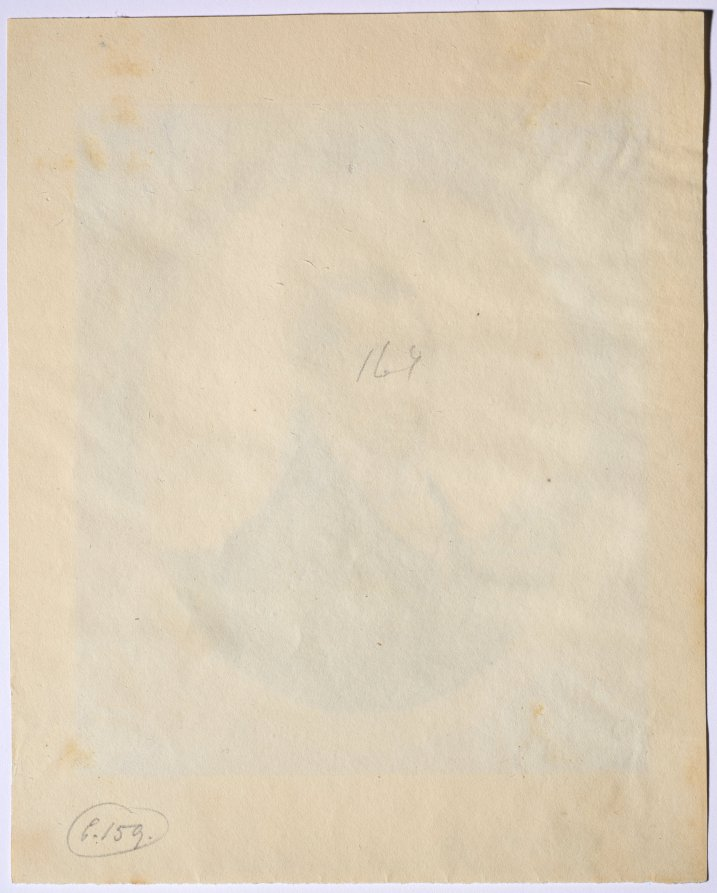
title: Portrait of General Keith MacAlister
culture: England, 18th century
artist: John I Smart (British, 1741–1811)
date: c. 1800–1810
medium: watercolor and graphite, heightened with traces of white gouache, on paper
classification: Portrait Miniature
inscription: across bottom, in graphite: Genl Macalester ; VERSO, center, in graphite: 169; lower left, in graphite: l. 159. [circled]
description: Although it is impossible to say if it was always part of the artist’s process to execute a preparatory sketch prior to painting each miniature, we do know that John Smart retained many hundreds of these sketches. A great number were inherited by his son John James Smart, who in turn left them to his daughter Mary Ann Bose. Upon her death in 1934, they were divided between three of her children: William Henry Bose, Lilian Dyer, and Mabel Annie Busteed. General MacAlister is represented in three-quarter view, bust length, and facing the right. His eyes are blue, but the right eye is clouded and lighter in color than the left. There is no sign of isolated damage or fading, confirming that this color difference was among MacAlister’s physical attributes. He wears a brown coat; white, frilled vest edged in black; tall collar; and a white cravat tied in a bow. His closely cropped hair is powdered, and an unidentified rocky landscape through which a small river runs is painted in the background; it probably represents a place of personal significance in Scotland or India, possibly even Seringapatam and the Cauvery River. Smart depicted MacAlister inside of a penciled oval tromp l’oeil frame. The drawing is replete with physically informative details and is larger and more finished than drawings intended to function exclusively as preparatory sketches, though it may also have served this purpose. Beneath the elaborate penciled border is written in large graphite script “Genl Macalester.” This inscription is not in the artist’s hand and almost certainly a later addition. A Colnaghi label was removed from the verso after the work entered the museum’s collection. The sitter is likely Major-General Keith MacAlister (1746–1820) of the Madras Cavalry. He was the eldest of three soldier brothers who served with distinction in India. MacAlister was born at Skerrinish in the Isle of Skye and ascended through the ranks rapidly following his appointment as cadet in 1777. He became captain in 1796; lieutenant-colonel in 1799; colonel in 1809; and major-general in 1812. He is celebrated particularly for his role in the 1799 storming and capture of Seringapatam, a decisive battleground in the Fourth Anglo-Mysore War, and for rescuing his brother Matthew from a long imprisonment in the same city. MacAlister was also instrumental in organizing the Madras Light Cavalry.5 Smart’s portrait of MacAlister would have been painted between 1800 and 1810, when the sitter was an older man and had returned to England before settling in Scotland. The Nelson-Atkins Museum of Art owns a Smart portrait on ivory called Keith Michael Alexander, dated 1810. Although he wears a military uniform rather than civilian clothes, the sitter is identical to the one in the Cleveland drawing—note in particular the differently colored eyes and the blue veins at the left temple. Although it was painted in 1810, possibly some years after the Cleveland sketch, the sitter’s hair loss is more pronounced in the earlier drawing. This inconsistency can be explained by the fact that Regency fashion called for men to comb their hair forward, thereby obscuring baldness, as seen here. Otherwise, the portraits are so similar that it is likely that Smart was consulting the earlier finished drawing when executing the 1810 miniature in ivory. Both “General Macalister” and “Colonel Keith Michael Alexander” are listed by Daphne Foskett among Smart’s sitters, but she reproduces images only of the latter Nelson-Atkins miniature. No additional portraits of the period depicting gentlemen of either name have been discovered at this time. The Nelson-Atkins ivory has been called Keith Michael Alexander by tradition at least since it was in the Mr. and Mrs. John W. Starr collection before entering the museum in 1958. However, the miniature has not been removed from the frame since its acquisition, and there is no evidence of an inscription. It is likely that Keith Michael Alexander is a mistaken interpretation of the name Keith MacAlister, particularly because no record of a soldier by the name of Keith Michael Alexander has been discovered.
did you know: Sketches helped John Smart work out the particulars of a portrait before commencing the miniature on ivory; they were useful in the event that a duplicate might later be required.